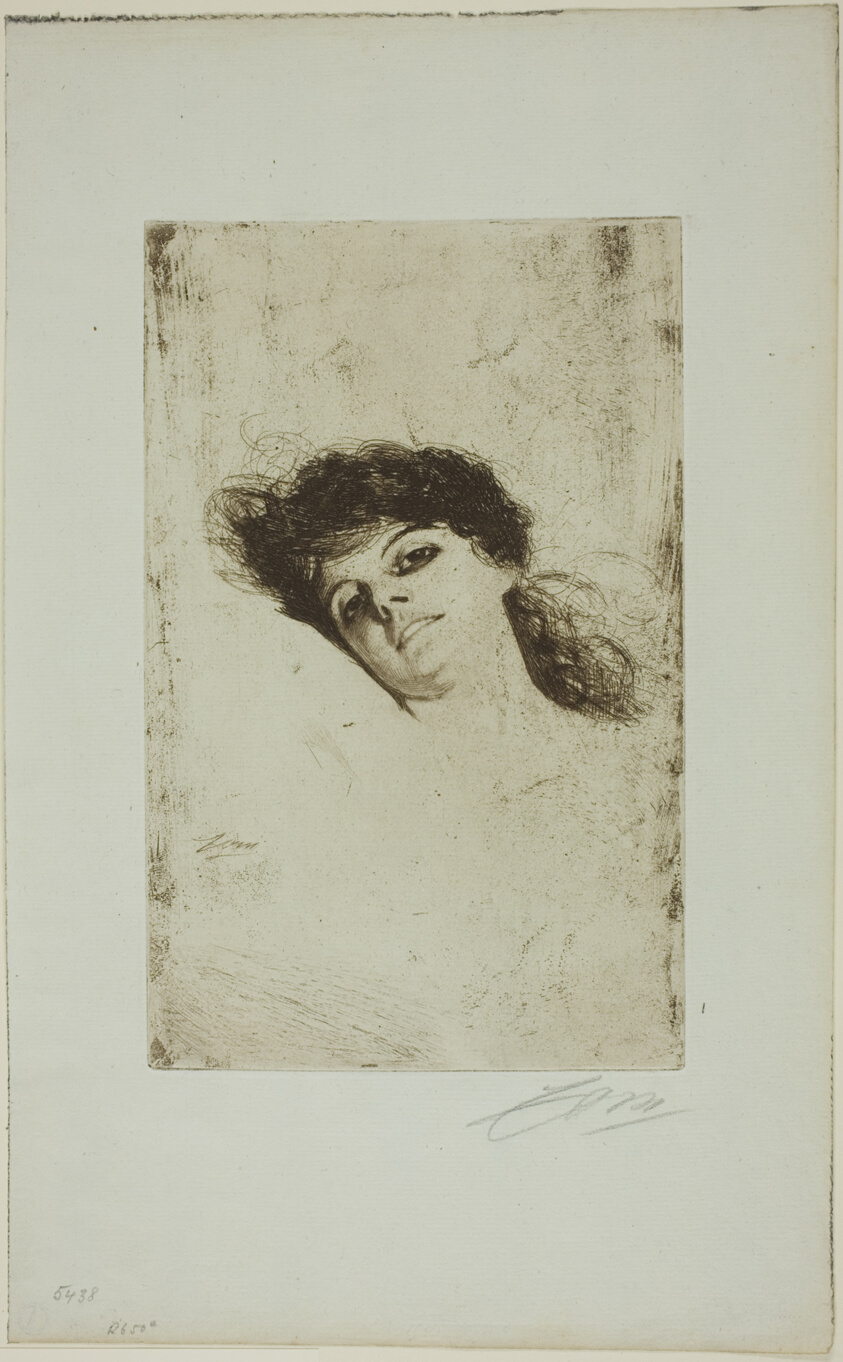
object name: Print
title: Mary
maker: Anders Zorn (Swedish, 1860-1920)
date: 1884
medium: Etching on off-white laid paper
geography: Sweden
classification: etching; print; prints and drawing